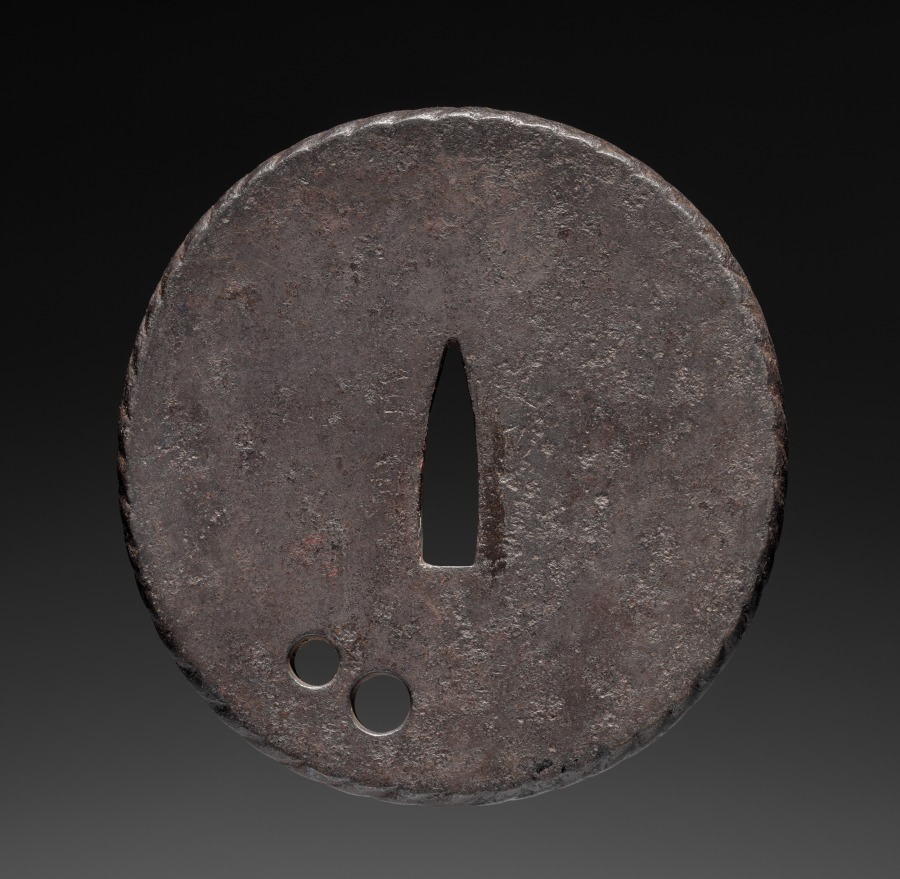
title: Sword Guard (Tsuba)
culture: Japan, possibly Edo period (1615-1868)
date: c. 1615–1868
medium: iron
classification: Arms and Armor